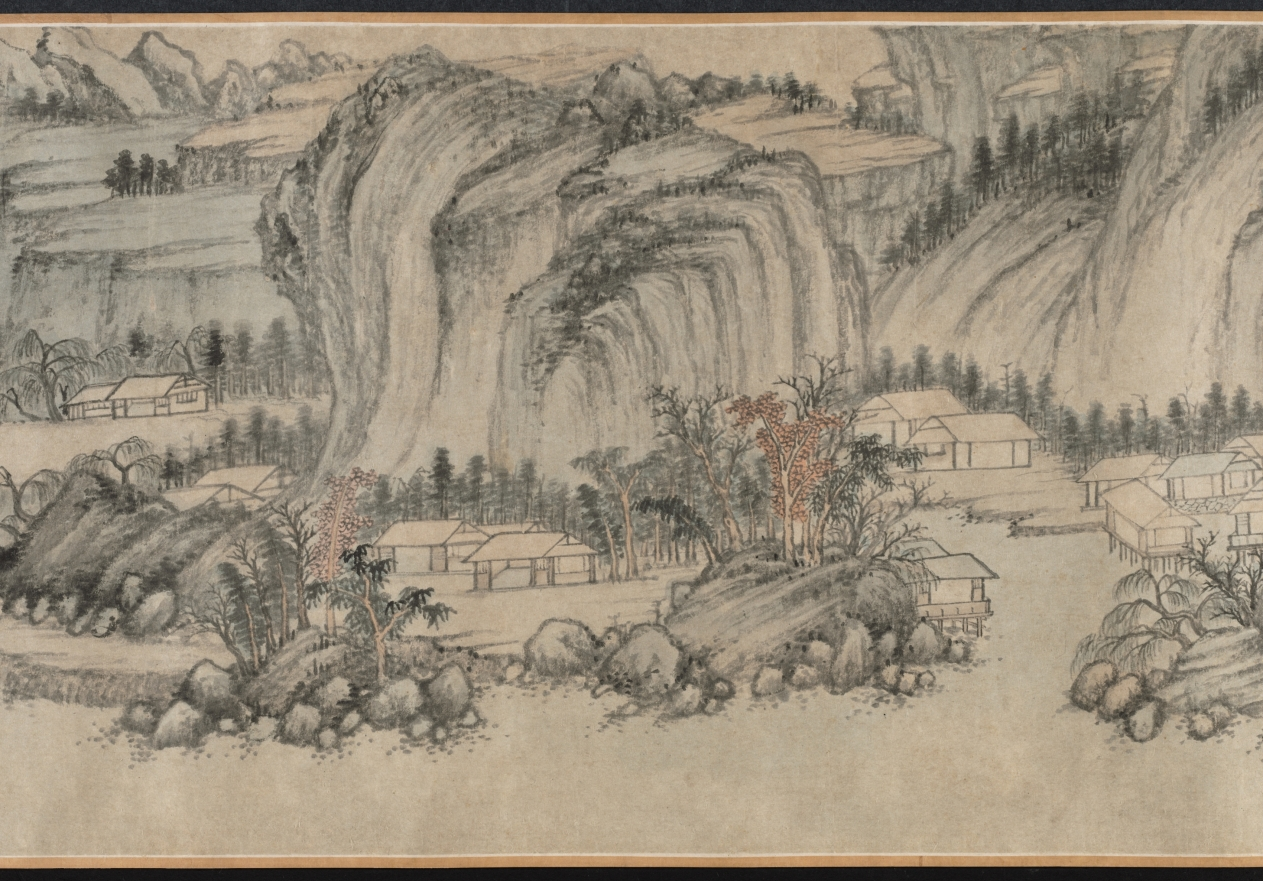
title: Mt. Taibo in the Style of Wang Meng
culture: China, Ming dynasty (1368–1644)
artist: Du Qiong (Chinese, 1396–1474)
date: 1442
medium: handscroll; ink and light color on paper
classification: Painting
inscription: Artist's inscription, signature, and 11 seals: [1 seal] Tung-yüan chai. Huang-ho-shan-ch'iao [Wang Meng] painted a painted called T'ai-po Mountain. Its brushwork is superior and admirable, which is very close to Yu-ch'en [Wang Wei, 699-759]. The cleverness of its composition, the maple groves and rustic temples, the inaccessible ravines and autumnal plateaus, the periolous peaks and strange rocks, etc., all seem to be so natural. The paper is only a little over eight feet, but the landscape has the range of a thousand miles. Once you open and note the contents, it is as if one were roaming among the mountain peaks enveloped in mist and clouds, and forgot the dusty world. When I first saw this, I was so mixed with excitement and joy that I could not take my hands off the painting. So I put it on the table, and tried my best to imitate it, forgetting sleeping and eating for about three months before it was completed. Although I do not dare to tread in the footsteps of Huang-ho shan ch'iao, I took great pains to capture his spirit in composition and colors. I do not know whether it would pass the judgment of the experts. On the fifteenth day of the fifth month, the seventh year of the Cheng-t'ung year [1442], inscribed by Tung-yüan, Tu Chiung. [2 seals] Yung-chia; Ching-chieh ming-men. [8 seals on painting] Tung-yüan chai; Ching-chieh ming-men; Yung-chia; Tu Ch'iung yin; Tung-yüan (repeated 5 times). trans. WKH/LYSL 3 colophons and 7 additional seals: 1 colophon and 2 seals of Chou Ting (1401-1487); 1 colophon and 2 seals of Wu K'uan (1435-1504); 1 colophon, dated 1655, and 2 seals of Lan Ying (1585-after 1664).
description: When a Chinese painter "imitated" a painting by a past master, the intention was never to produce an exact copy. Du Qiong, the Ming painter from Suzhou, is a case in point. The painting style of this handscroll is actually closer to that of Huang Gongwang (1269–1354) than to the style of Wang Meng (about 1301–1385). Both masters were active during the previous dynasty and are among the so-called Four Great Masters of the Yuan dynasty (1279–1368). In this painting, the interplay of styles, including Du Qiong's own, contribute to an inner dimension that is more than visual. Mt. Taibo is located in the province of Zhejiang and is known for its scenic beauty. In this scroll, however, it is not depicted literally. The image is an ideal representation of mountains in southeastern China.